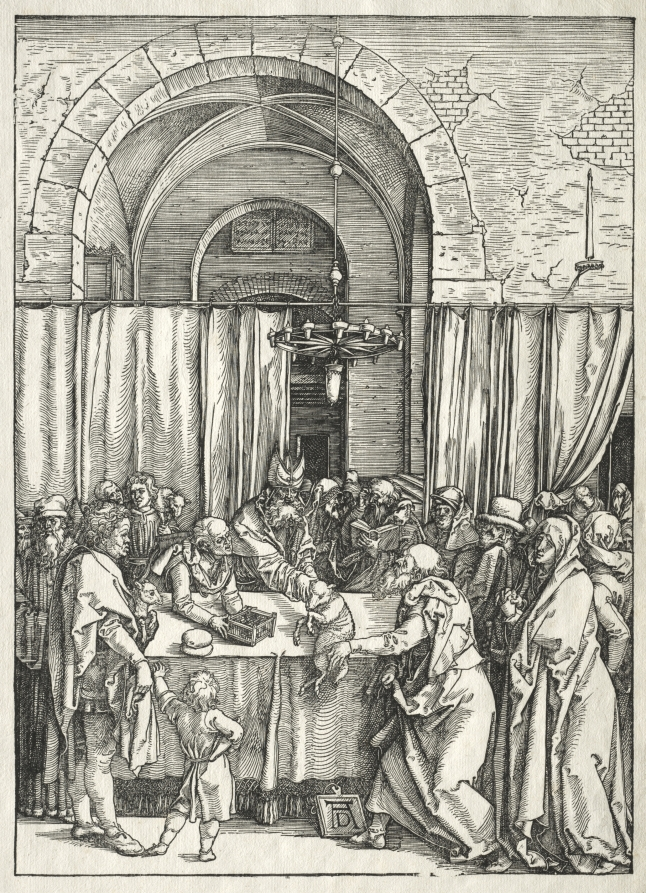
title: Life of the Virgin: Rejection of Joachim's Sacrifice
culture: Germany, early 16th Century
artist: Albrecht Dürer (German, 1471–1528)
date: 1504–1505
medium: woodcut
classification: Print